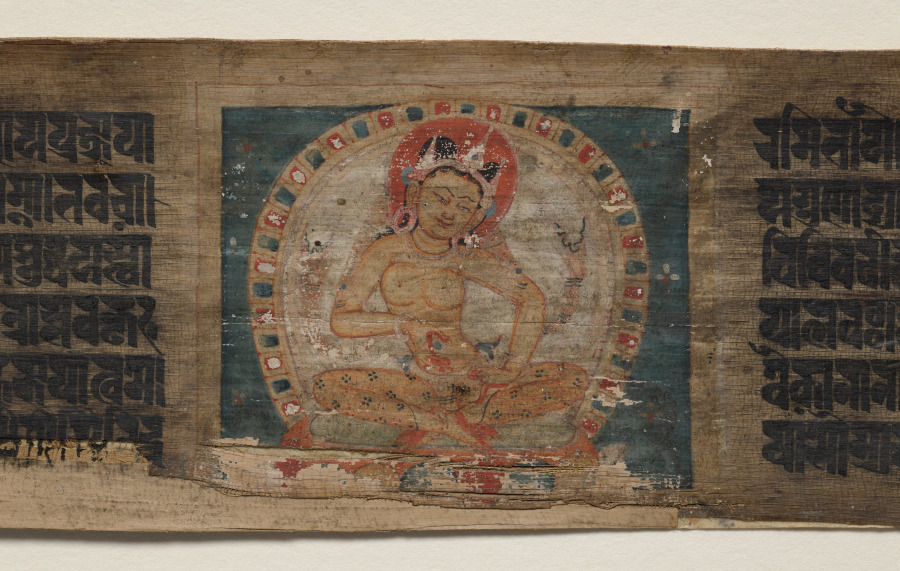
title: Prajnaparamita ﬂanked by two female ﬁgures, folio 1 (verso), from a Manuscript of the Perfection of Wisdom in Eight Thousand Lines (Ashtasahasrika Prajnaparamita-sutra)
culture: Eastern India, Bihar, Vikramashila Monastery. Painting: Nepal, Kathmandu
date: Sunday, September 14, 1119 (year 239 of the Newar Samvat in the month of Ashvina)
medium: Gum tempera and ink on palm leaf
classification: Painting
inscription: Om namo bhagavatya ārya Prajñāpāramitāyai // nirvikalpe namas tubhyaṃ prajñāpāramite 'mite yā tvaṃ sarvānavadyāṅgi niravadyair nirīkṣyase // ākāśam iva nirlepāṃ niṣprapañcāṃ nirakṣarām yas tvāṃ paśyati bhāvena sa paśyati tathāgatam // tava cārye guṇāḍhyāyā buddhasya ca jagadguroḥ na paśyanty antaraṃ santaś candracandrikayor iva // kṛpātmakāḥ prapadya tvāṃ buddhadharmapuraḥsarīm sukhenāyānti māhātmyam atulaṃ bhaktivatsale // sakṛd apy āśaye śuddhe yas tvāṃ vidhivad īkṣate tenāpi niyataṃ siddhiḥ prāpyate 'moghadarśane // sarveṣām api vīrāṇāṃ parārthaniratātmanām poṣikā janayitrī ca mātā tvam asi vatsalā // yad buddhā lokaguravaḥ putrās tava kṛpālavaḥ tena tvam api kalyāṇi sarvasattvapitāmahī // sarvapāramitābhis tvaṃ nirmalābhir anindite candralekheva tārābhir anuyātāsi sarvadā // vineyaṃ janam āsādya tatra tatra tathāgataiḥ bahurūpā tvam evaikā nānānāmabhir īḍyase // prabhāṃ prāpyeva dīptāṃśor avaśyāyodabindavaḥ tvāṃ prāpya pralayaṃ yānti doṣā vādāś ca vādinām // tvam eva trāsajananī bālānāṃ bhīmadarśanā āśvāsajananī cāsi viduṣāṃ saumyadarśanā // yasya tvayy apy abhiṣvaṅgas tvannāthasya na vidyate tasyāmba katham anyatra rāgadveṣau bhaviṣyataḥ // nāgacchasi kutaś cit tvaṃ na ca kva cana gacchasi sthāneṣv api ca [sarveṣu vidvadbhir nopalabhyase //]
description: In the center of the first folio, the personification of the texts found within the manuscript is shown as a crowned four-armed goddess holding a rosary, palm leaf, and giving a mudra, or symbolic hand gesture, indicating that she is in the process of teaching. The haloed Prajnaparamita’s golden skin tone and accoutrements showcase the image’s self-reflexive relationship to the light-colored palm leaf that was used to make this book. The text on this leaf is not the Perfection of Wisdom itself, but rather a preamble of praises to the goddess known as the Prajnaparamita-stotra of Rahula. These hymns would have continued onto folio 2 of the manuscript, which was unfortunately lost before the volume was acquired by the Cleveland Museum of Art.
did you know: Although barely visible now, delicate diaphanous scarves are draped around the arms of all three figures.